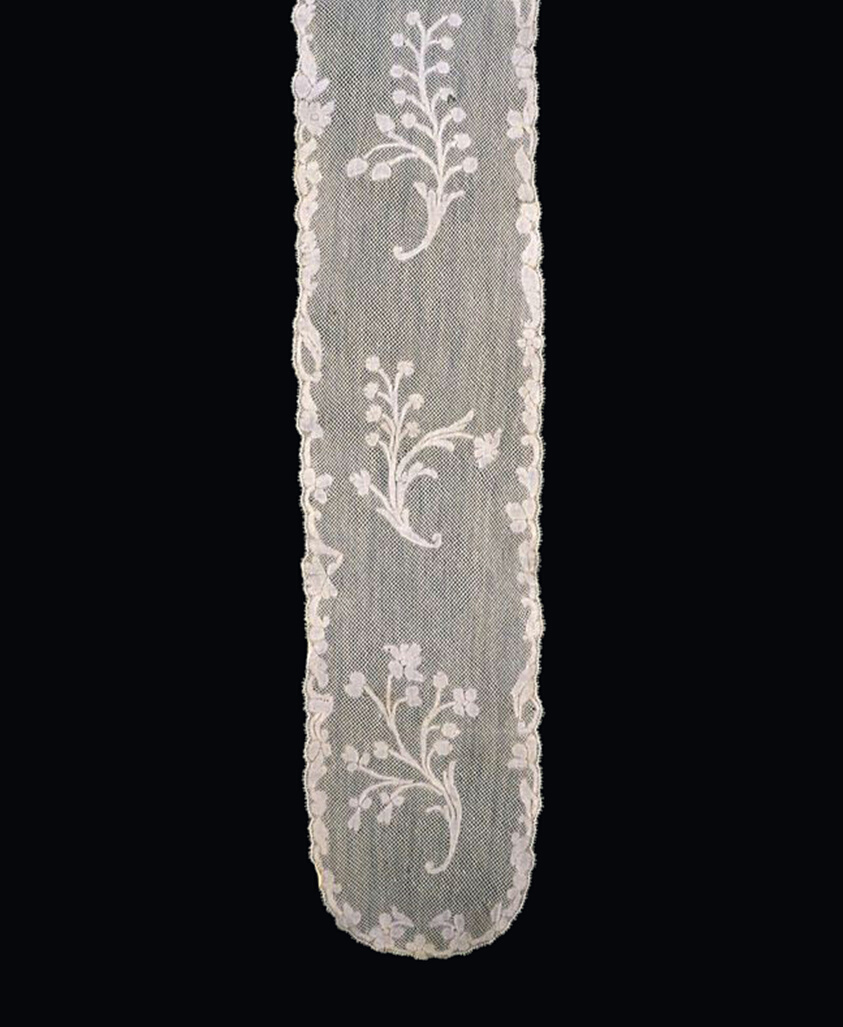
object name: Costume and Accessories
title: Pair of Lappets (Joined)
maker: France, Valenciennes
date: 1775/85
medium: Linen, bobbin straight lace of a type known as "Valenciennes" with a square Valenciennes mesh ground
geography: Valenciennes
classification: costume accessory; lace - bobbin; textile; costume; costume accessory - headdress; costume accessory worn above the waist